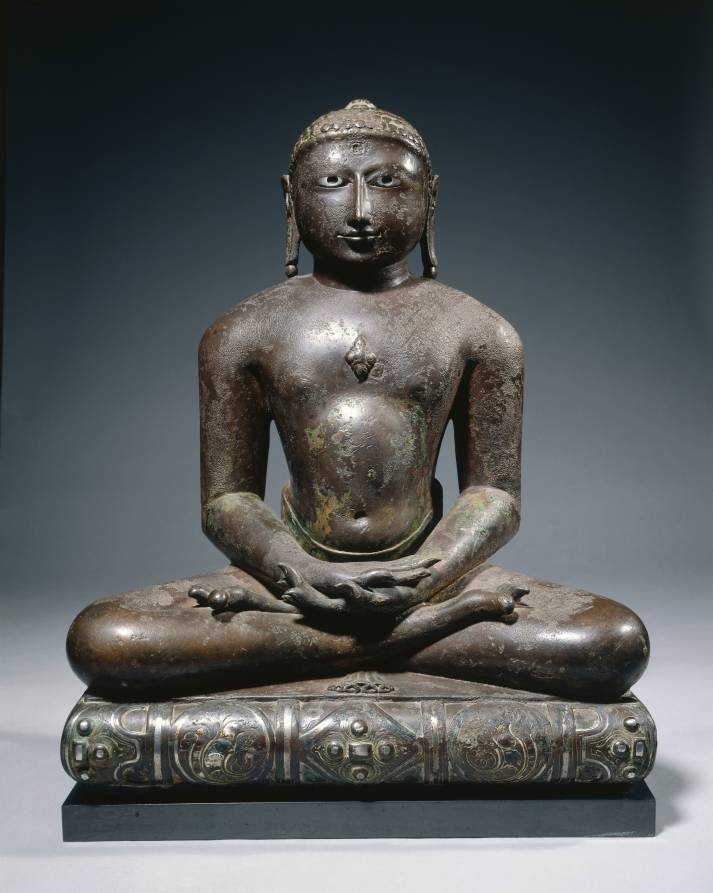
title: Jina (Tirthankara)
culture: India, Rajasthan, Medieval period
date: 900s–1000s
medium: bronze with silver inlay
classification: Sculpture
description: Jainism was one of the three major religions to evolve in India, the other two being Hinduism and Buddhism. While each religion developed its own particular characteristics, their beliefs maintained a common ground with Hinduism. In both Jainism and Buddhism, deities symbolize enlightened beings whose example is meant to inspire believers in following the path toward salvation rather than worshipping them. In Jainism the most common deities are Jinas (meaning "liberators" or "victors"), also known as Tirthankaras ("holy men"). As the name implies, they are beings "liberated" through enlightenment from the cycle of rebirth. There are 24 of these Jain patriarchs. This sculpture represents one of the 24 Jinas, but the absence of attributes makes it impossible to determine which one. This is not surprising since Jinas tend to look alike. Although this figure wears a cloth around his waist, Jinas are usually shown naked—a reference to their renunciation of worldly goods—and seated cross-legged in the posture of meditation (dhyanasana) with their hands resting in their laps (in the dhyana mudra), palms turned upward. Their physical appearance is always the same: broad shoulders, tapering torso, and long, highly stylized limbs. The head, with its round face and short-cropped curls, has a small protrusion at the top. The facial expression conveys self-assurance, wisdom, and compassion. Such a figure would usually have a halo attached to the back of the head. The present bronze dates to a time when some of the finest Jain sculptures and monuments were produced in India, as documented by such temples as Mt. Abu in Rajasthan (the area where this sculpture originated), Khajuraho in Madhya Pradesh, or Srivana Belgola in Karnataka.